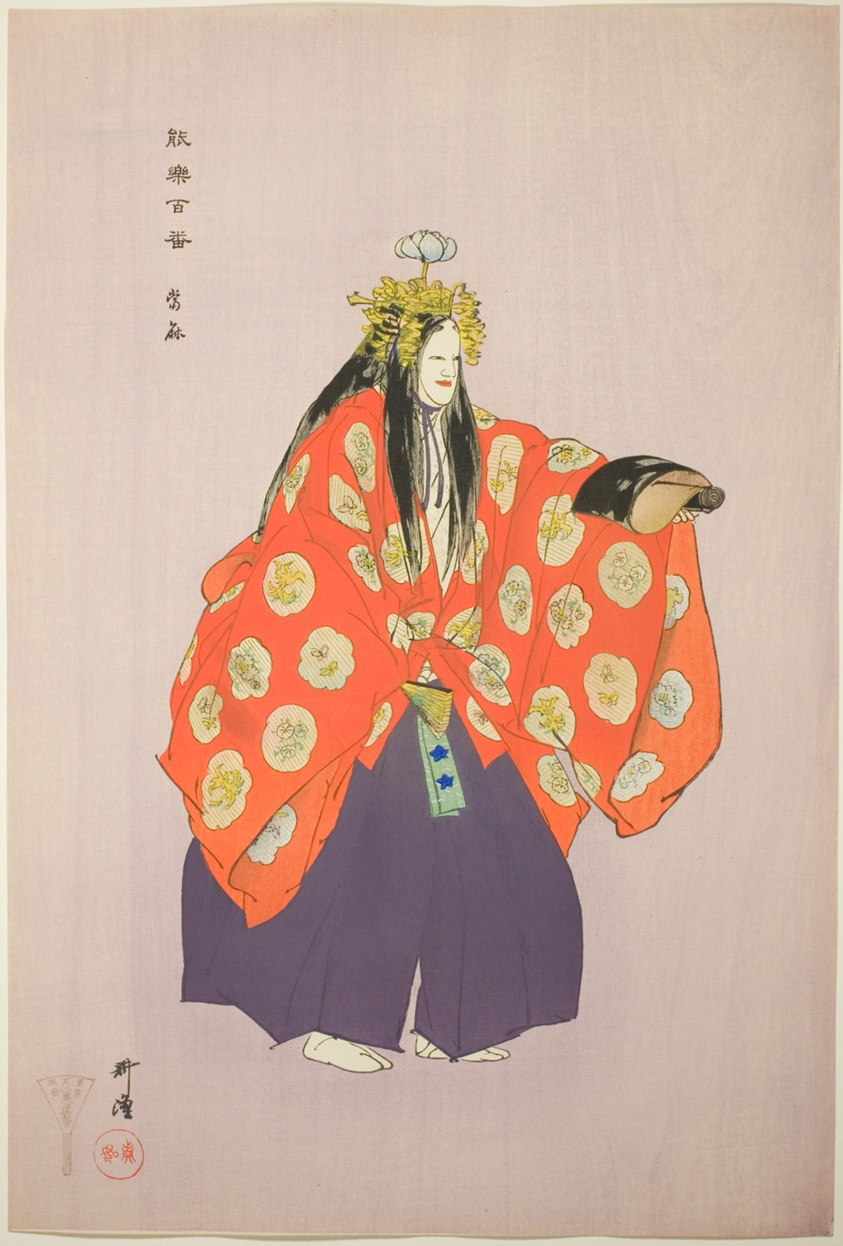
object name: Print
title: Taema, from the series "One Hundred No Dramas (Nogaku hyakuban)"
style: Japanese (culture or style)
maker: Tsukioka Kogyo; Japanese, 1869-1927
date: 1898/1903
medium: Color woodblock print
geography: Japan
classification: woodblock print; print; asian art